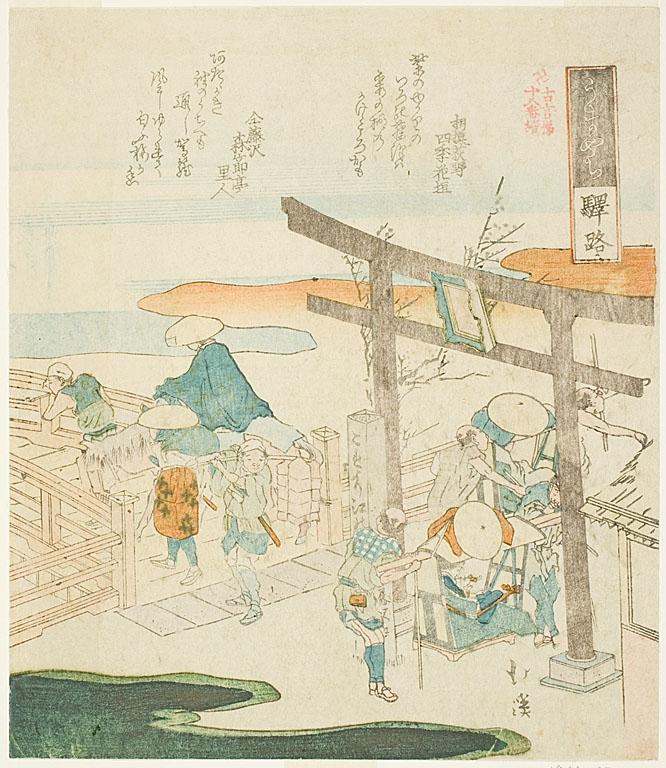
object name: Print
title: The Street of the Post Station (Umayachi), from the series “Eighteen Illustrations of the Ladder of Ancient Words (Kogentei juhachiban tsuzuki)”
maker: Totoya Hokkei (Japanese, 1780-1850)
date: 1831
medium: Color woodblock print; surimono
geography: Japan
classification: woodblock print; print; asian art